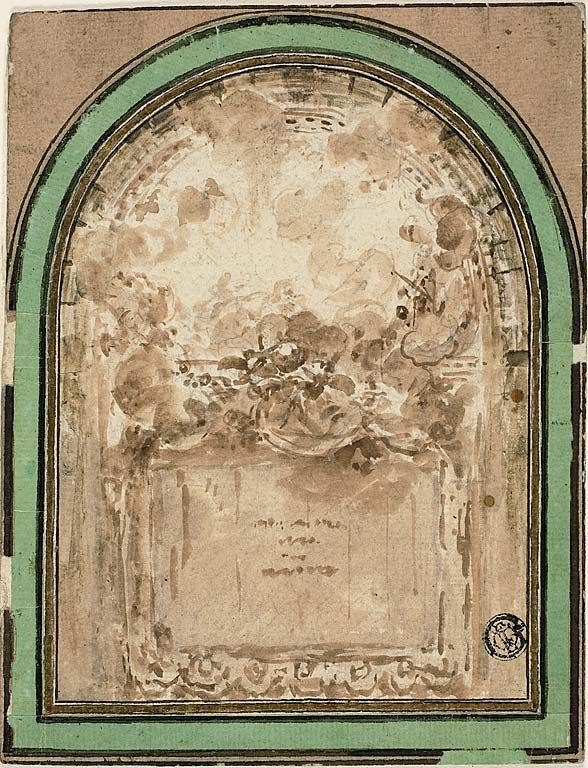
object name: Drawing and Watercolor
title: Project for the Ceiling of the Salle de Spectacle de Besancon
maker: Attributed to Claude Nicolas Ledoux; French, 1736-1806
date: c. 1776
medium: Brush and brown wash, over traces of graphite, on ivory laid paper (lunette), laid down on card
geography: France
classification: ink or chalk wash; drawings (visual works); prints and drawing